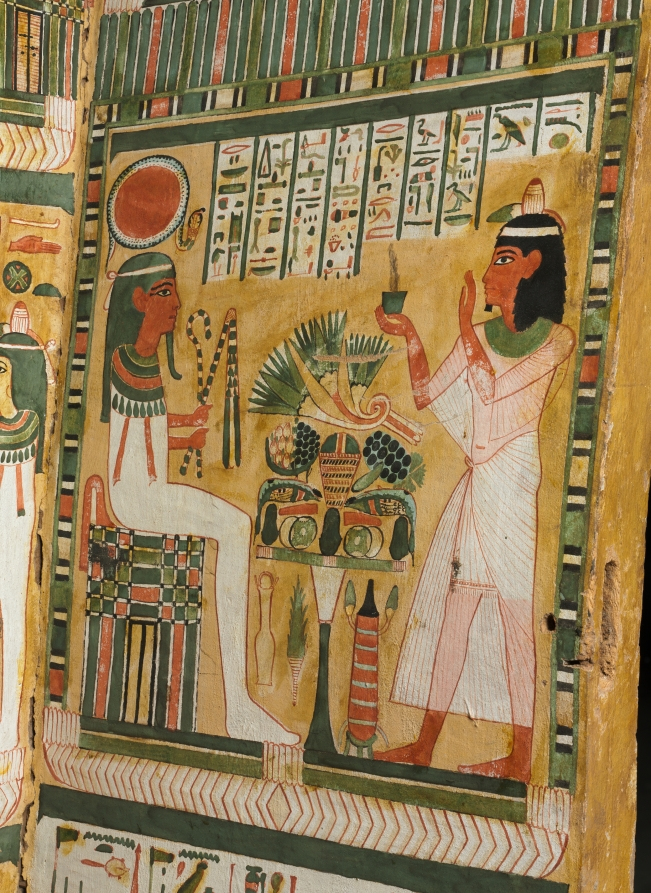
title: Coffin of Bakenmut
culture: Egypt, Thebes, Third Intermediate (1069–715 BCE), Dynasties 21–22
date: c. 1000–900 BCE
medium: gessoed and painted sycamore fig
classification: Funerary Equipment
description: The coffin of Bakenmut is one of the finest examples of painted wooden coffins made for the priests of Amen and their families at Thebes during Dynasty 21 and early Dynasty 22. The pharaohs of this time were no longer buried in the Valley of the Kings, but instead built tombs in the Delta, far to the north, where they resided. Security was lax in the Theban necropolis. The coffins and funerary goods of the wealthy citizens of Thebes were placed in unmarked and undecorated family tombs cut into the cliffs on the west bank of the Nile. All the care and detail that in more prosperous times were devoted to the decoration of the tomb chapel were now lavished on the elaborately painted coffins. Every available surface is crowded with religious scenes, images of funerary gods and goddesses, protective spells, and magical symbols. The deceased appears mummiform. An elaborate floral collar entirely covers the upper body, exposing only the separately attached hands (now lost). A pair of red "mummy braces" are crossed over the chest, their point of intersection marked by a winged sun disk. The lower body is covered with tiny figures modeled in gesso against a yellow background, which gives the effect of gold inlaid with glass or semiprecious stone. The decoration on the interior features two deified dead kings of Dynasty 18. Although these rulers had lived centuries before, memory of their greatness was still very much alive. The main scene near the top depicts Tuthmosis III, the great military pharaoh, who lived 500 years before Bakenmut. Posed as a mummy, the ruler wears a brilliant feathered garment enfolding him with falcon’s wings. The scene below features back-to-back seated images of Amenhotep I, regarded as the patron of the Theban cemetery and worshiped as a local god there.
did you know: Originally another smaller coffin was placed inside this outer coffin and in that the deceased with a mummy board would have rested.